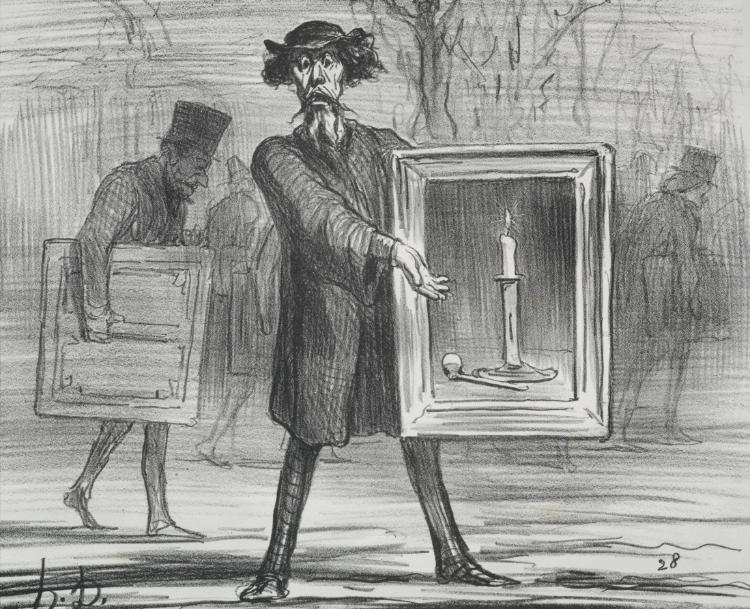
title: They refused this..., the ignoramuses!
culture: France, 19th century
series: The Exhibition of 1859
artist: Honoré Daumier (French, 1808–1879)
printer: Destouches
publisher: Mon. Martinet, r. Rivoli, et 41 r. Vivienne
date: 1859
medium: lithograph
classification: Print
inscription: Above image, printed: L'EXPOSITION DE 1859. / 1 ; Below image, printed: -Ils m'ont refuse ça ...... les ignares!!.....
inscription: Upper margin, pencil: H.D 1731 ; lower margin, printed: maison Martinet, 172, r. Rivoli et 41, r. Vivienne / Lith. Destouches, 28, r Paradis Pre. Paris.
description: This print was published in Le Charivari (April 6, 1859) as plate 1 from the series The Exhibition of 1859.